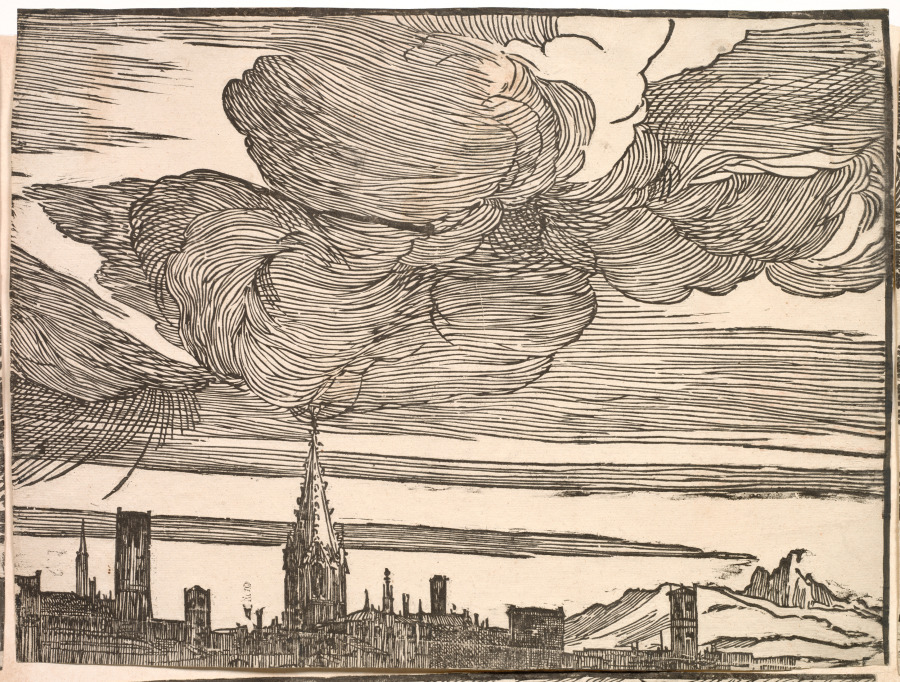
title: The Submersion of Pharaoh's Army in the Red Sea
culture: Italy, Venice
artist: Titian (Italian, c. 1488–1576)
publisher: Domenico dalle Greche (Italian, 1503–1603)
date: 1514–15, printed 1549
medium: woodcut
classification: Print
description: To make this monumental woodcut—considered one of the most ambitious prints of the Renaissance—Titian probably drew directly on the wooden blocks, after which a skilled cutter completed the blocks. The size rivals that of a painting, and the composition would have hung on a wall. Titian’s bold vision presents nature as a vehicle of God’s mercy and wrath. Moses, at right, having parted the seas for the Israelites to pass, commands them to close over the Egyptian forces (Exodus 14:21–31). Titian propelled the narrative with remarkable unity, dedicating entire blocks to the turbulent sea and rolling clouds that culminate in a magnificent cliff and Renaissance city. Some have interpreted the scene as an allegory of Venice’s troubles with the League of Cambrai, a military alliance that threatened the island city.